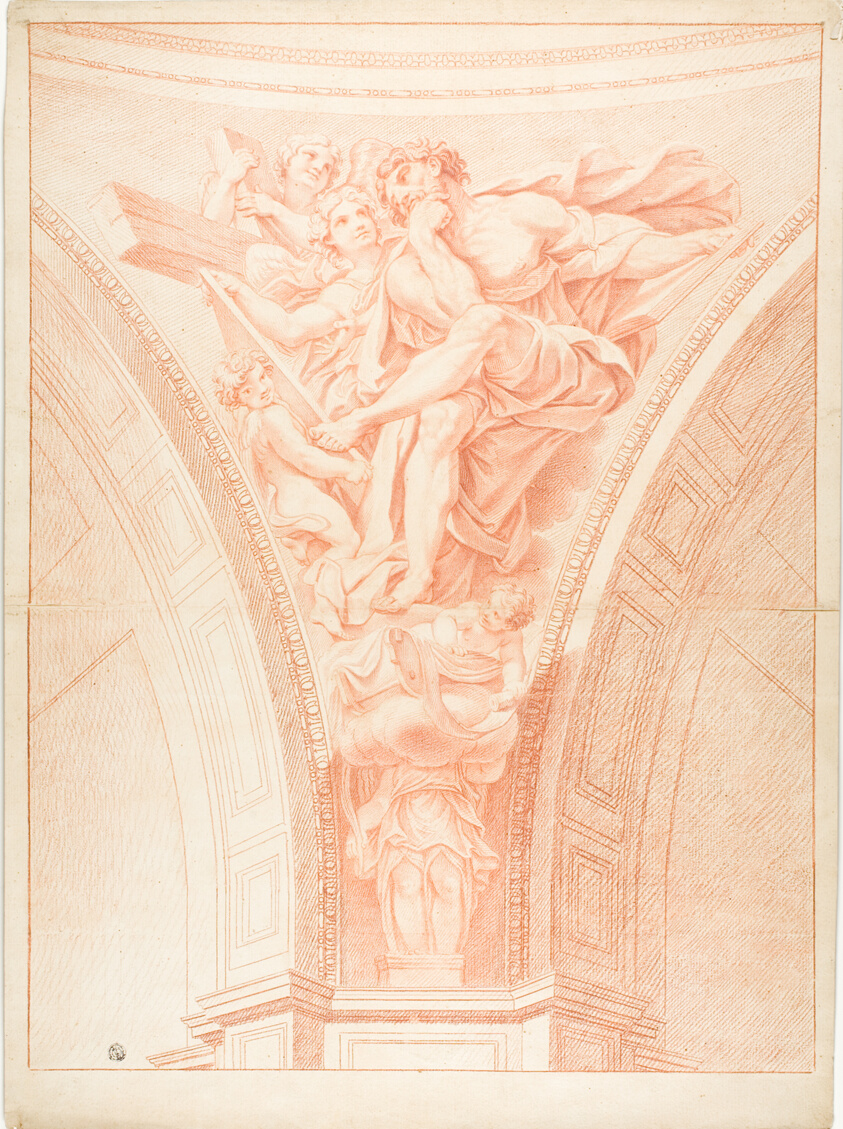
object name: Drawing and Watercolor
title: Saint Matthew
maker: After Domenichino; Italian, 1581-1641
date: after 1627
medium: Red chalk on buff laid paper, laid down on cream laid paper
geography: Italy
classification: chalk; drawings (visual works); prints and drawing